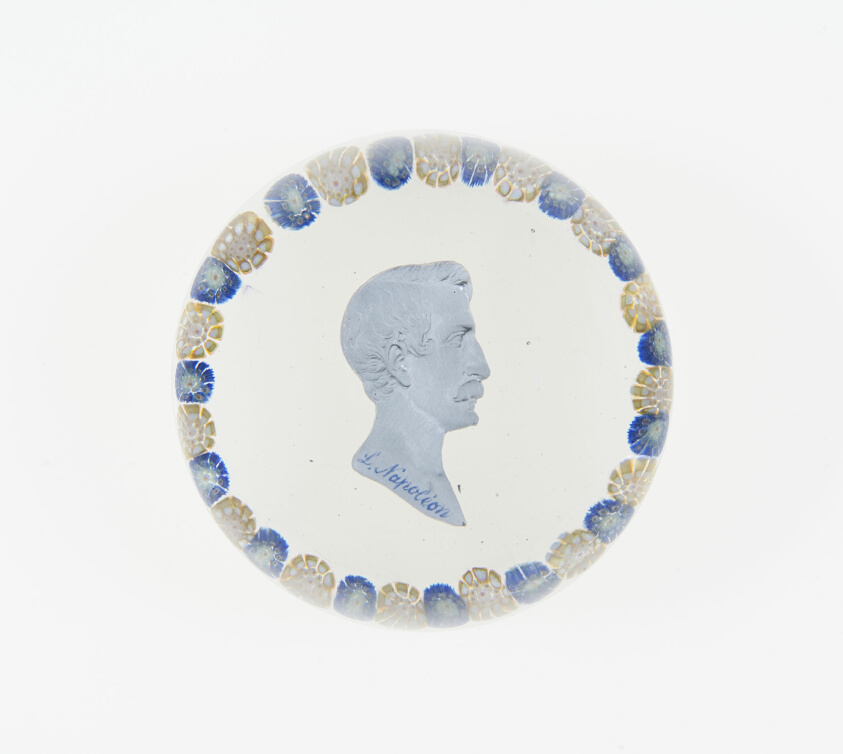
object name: Glass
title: Paperweight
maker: Saint-Louis Glassworks (Cristalleries de Saint-Louis); Lorraine, France, founded 1586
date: c. 1846–55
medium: Glass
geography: Saint-Louis-lès-Bitche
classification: paperweight; sulphide (glass); european decorative arts; glass